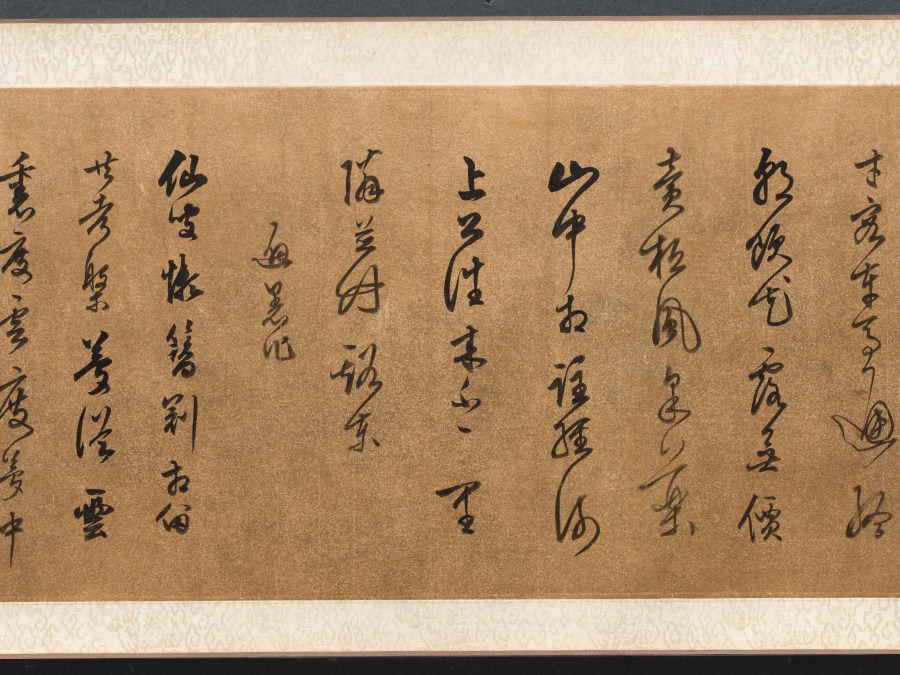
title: Four Poems: Calligraphy in Cursive Script (xingshu)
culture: China, Ming dynasty (1368–1644)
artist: Chen Jiru (Chinese, 1558–1639)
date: 1500s-1600s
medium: handscroll; ink on gold speckled paper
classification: Calligraphy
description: Written in graceful calligraphy with well-composed characters, the artist communicates his thoughts and state of mind in four poems. Characters written in dark, thick strokes convey rhythm, and indicate the moment after the writer had paused to recharge his brush with ink. Chen Jiru was a native of Huating (modern Shanghai). His calligraphy style resembles that of his friend, influential calligrapher Dong Qichang (1555–1636). Unlike Dong, Chen did not pursue government service: he burned his Confucian robes, declined a summons to serve at court, and immersed himself in literature, calligraphy, and painting.